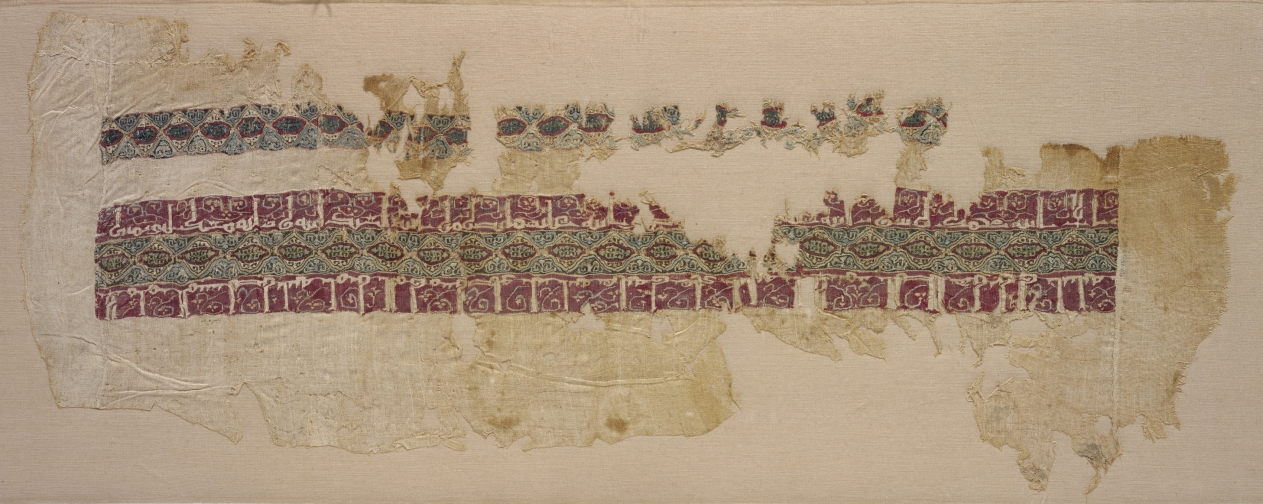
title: Sleeve with tiraz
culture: Egypt, Fatimid period, reign of Caliph al-Mustansir, 1045-58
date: 1045 – 1058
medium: plain weave with inwoven tapestry weave: linen and silk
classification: Textile